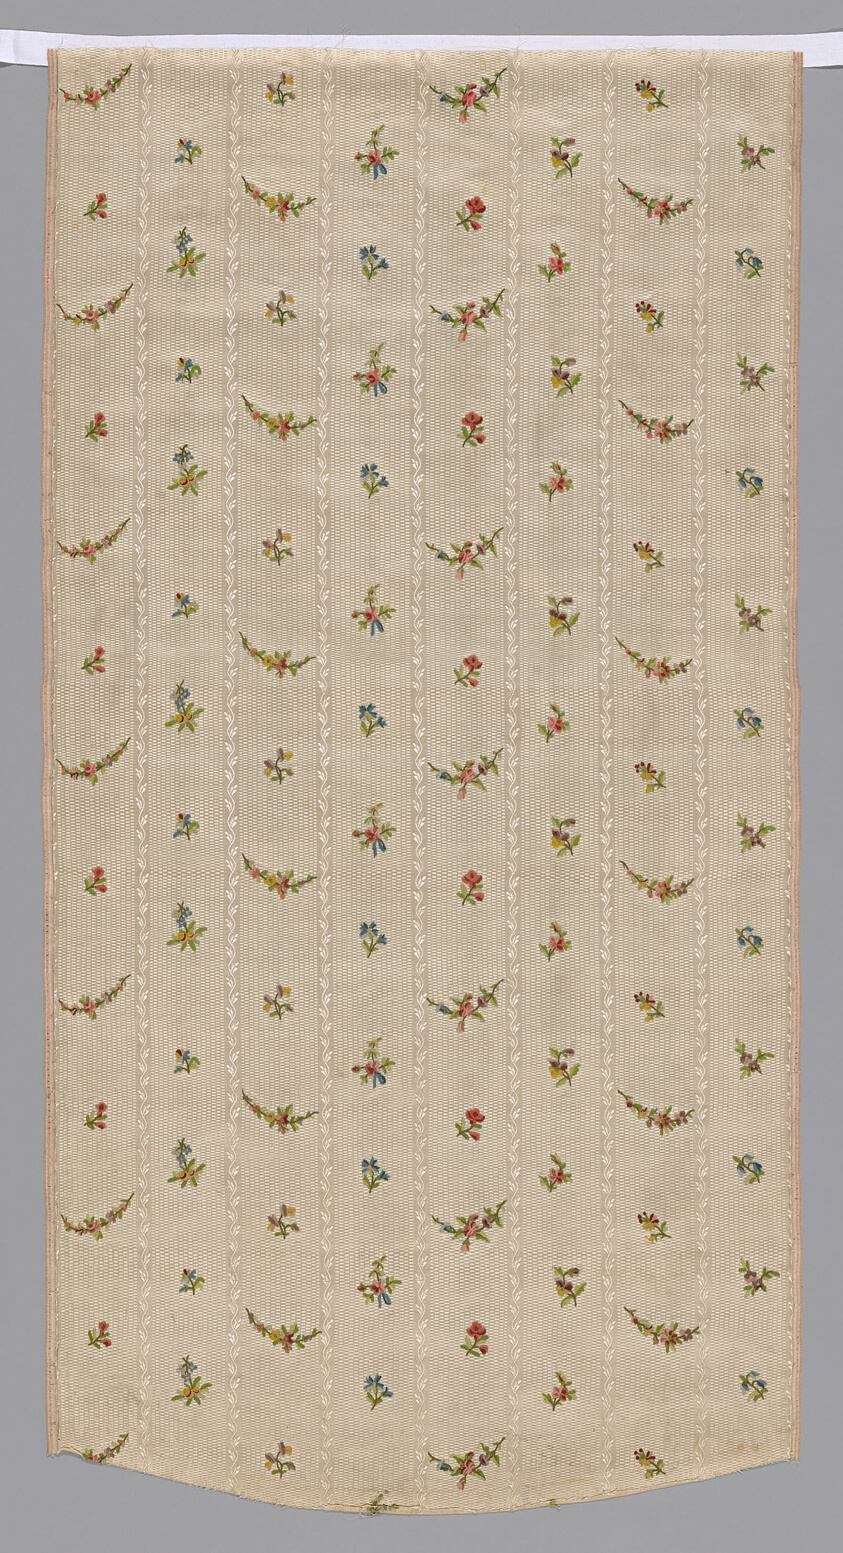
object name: Textile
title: Panel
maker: England or France, Lyon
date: 1770/75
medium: Silk, stripes of warp-float faced 7:1 satin weave; of satin weave self-patterned by main warp and ground weft floats over plain interlacings of secondary binding warps and ground wefts; and of plain weave with supplementary patterning warps; embroidered with silk in machine-made chain stitches (tambour work)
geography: England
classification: textile; needlework (visual works)